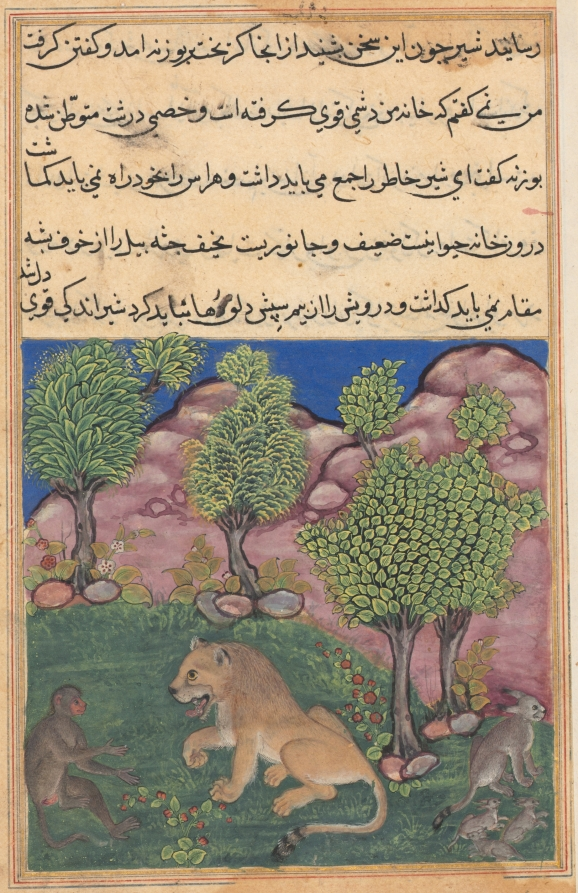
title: The monkey advises the suspicious lion to cast off fear and take possession of his territory, from a Tuti-nama (Tales of a Parrot): Twenty-ninth Night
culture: Mughal India, court of Akbar (reigned 1556–1605)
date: c. 1560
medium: gum tempera, ink, and gold on paper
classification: Painting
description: The monkey, acting as the lion’s chamberlain, encourages him to confront the family of lynx that have taken over his home. However, the lion is fearful, having been tricked into believing that the hidden lynx are vicious, lion-eating creatures.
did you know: The lynx family, unseen by the lion, appear on the right.